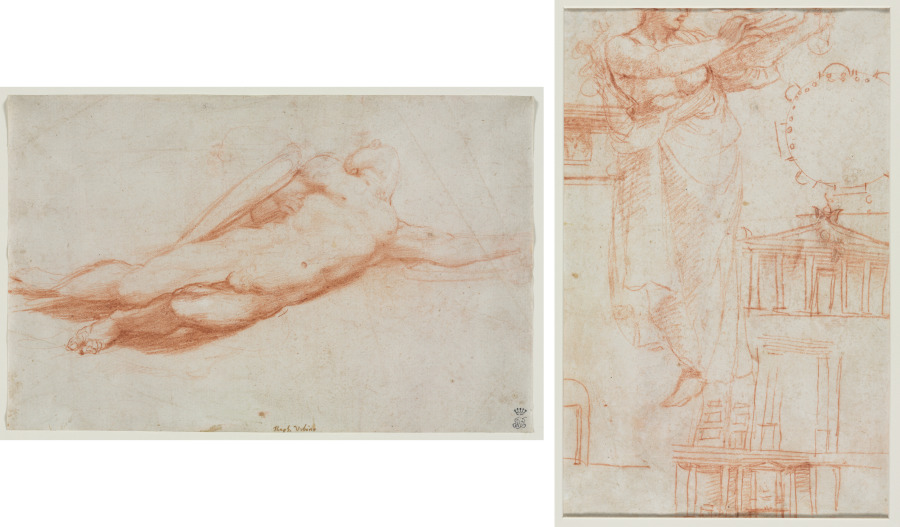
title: Study of a Fallen Soldier (possibly the Conversion of Saul) (recto); A Draped Female Figure (possibly an Amazon) and Architectural Studies (verso)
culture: Northern Italy, Emilia, first half 16th Century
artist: attributed to Correggio (Italian, 1489?-1534)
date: c. 1525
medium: red chalk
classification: Drawing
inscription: recto: in brown ink, lower center: Raph. Urbino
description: In this chalk study of a lone, fallen soldier, the brown ink inscription at the bottom of the sheet indicates that at one time it was believed to be by Raphael. However, it is now attributed to Correggio based on the sensuous drawing style that focuses attention on some details, like the soldier’s leg and foot, while other contours are barely sketched and shaded. The back, or verso, of the sheet presents quick sketches of classical-style architecture and a woman with a quiver of arrows on her back; she may be an Amazon, one of a race of warrior women skilled in archery, or Diana, goddess of the hunt.